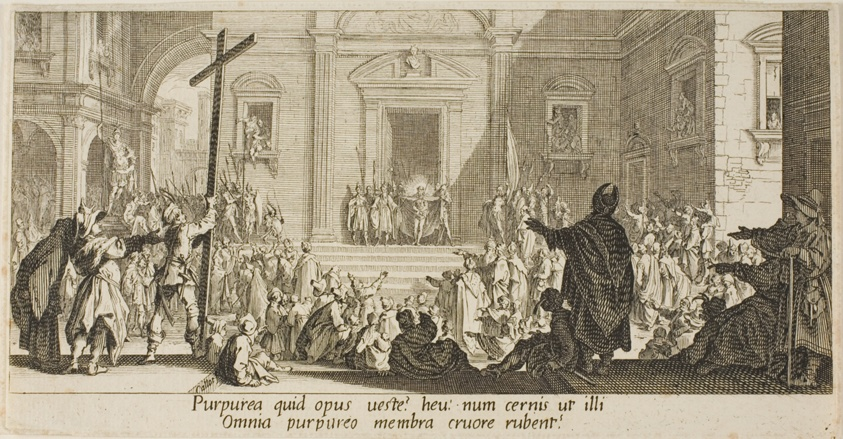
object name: Print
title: Ecce Homo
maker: Jacques Callot (French, 1592-1635)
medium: Etching on paper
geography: France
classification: etching; print; prints and drawing